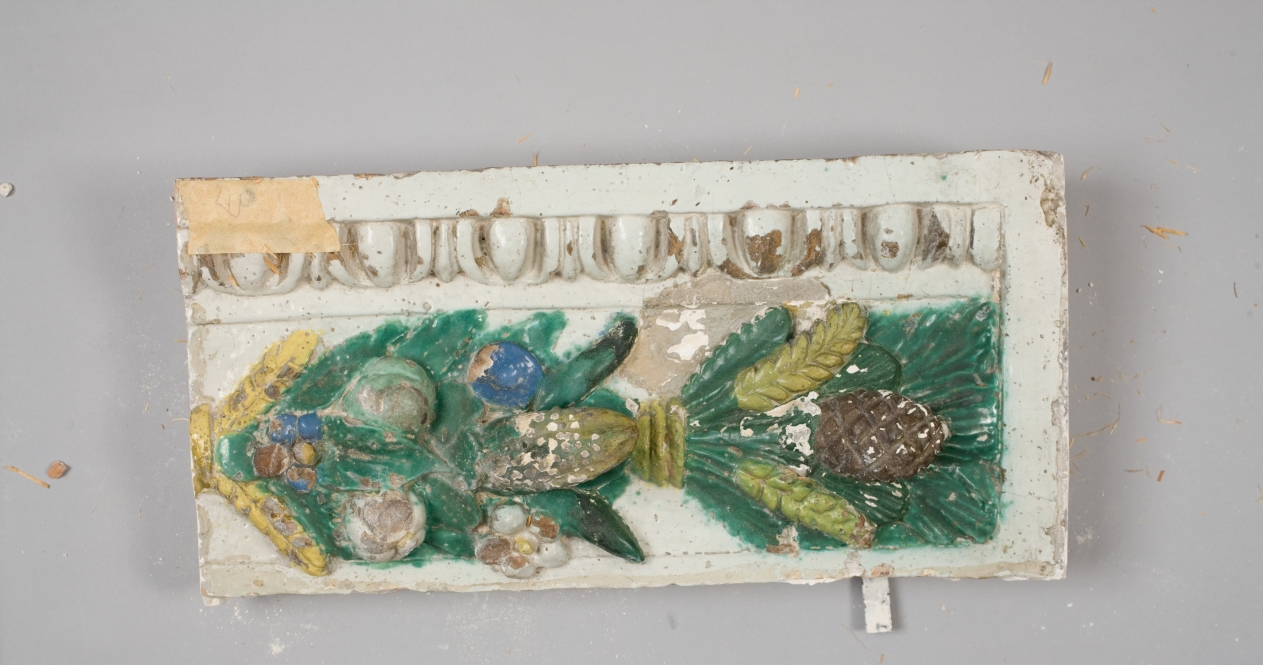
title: Fragment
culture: Italy, Florence, 16th century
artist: Benedetto Buglioni (Italian, 1461–1521)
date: c. 1900–1910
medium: glazed terracotta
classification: Sculpture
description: The Madonna sits upon a throne with the Christ Child standing on her knee. He is steadied by his mother, turning delicately to grasp the Virgin's robe for support. On the left is St. Francis, identified by his stigmata. On the right, St. Anthony Abbot is identified by his monk's robe and T-shaped walking stick. The brown robes of the saints, the purple of the Virgin's tunic (a shade characteristic of the artist), and the flesh tones of the figures contrast strongly against the bright blue background. In the semicircular sky behind the figures, three winged cherub heads emerge, representing a host of angels. The inclusion of St. Francis in this altarpiece honors the saint, suggesting that the altarpiece may have been originally built into the wall of a Franciscan institution in Tuscany. Two shields bearing the Borgherini family crest appear in the lower portion of the altarpiece's border, further suggesting that the chapel for which this altarpiece was made was likely owned or endowed by the family. Glazed terracotta is both durable and decorative and the gleaming white of this piece would have stood out in the darkness of a church. The medium was made popular by Renaissance artist Luca della Robbia and came into fashion as a substitute for expensive carved marble. A rounded arch frame embellished with fruit and flower garlands as well as egg-and-dart and cord moldings accompanied the work when it was acquired, but was later determined not to be original and removed. Buglioni's work bears the influence of the della Robbias, particularly in the simple color scheme. Buglioni likely worked in the studio of Luca's nephew, Andrea, where he would have learned the technique of glazing terracotta.